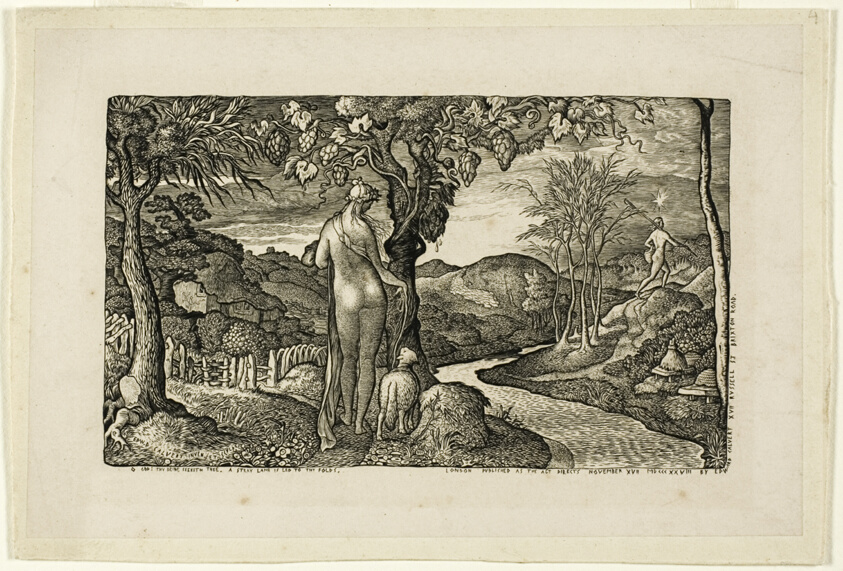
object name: Print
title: The Bride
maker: Edward Calvert (English, 1799-1883)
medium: Engraving on paper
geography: England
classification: wood engraving; print; prints and drawing